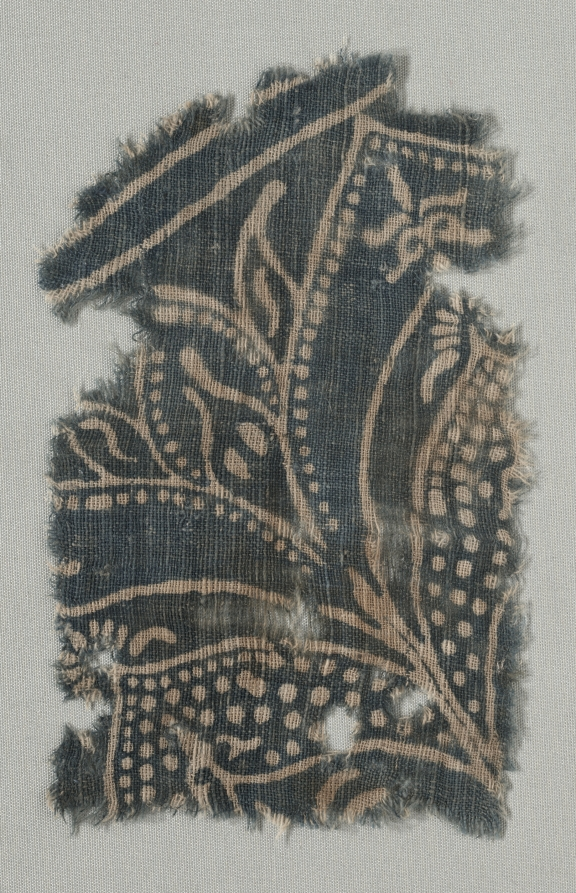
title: Fragment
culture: India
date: 1100s–1300s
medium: plain cloth, resist dyed; cotton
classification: Textile